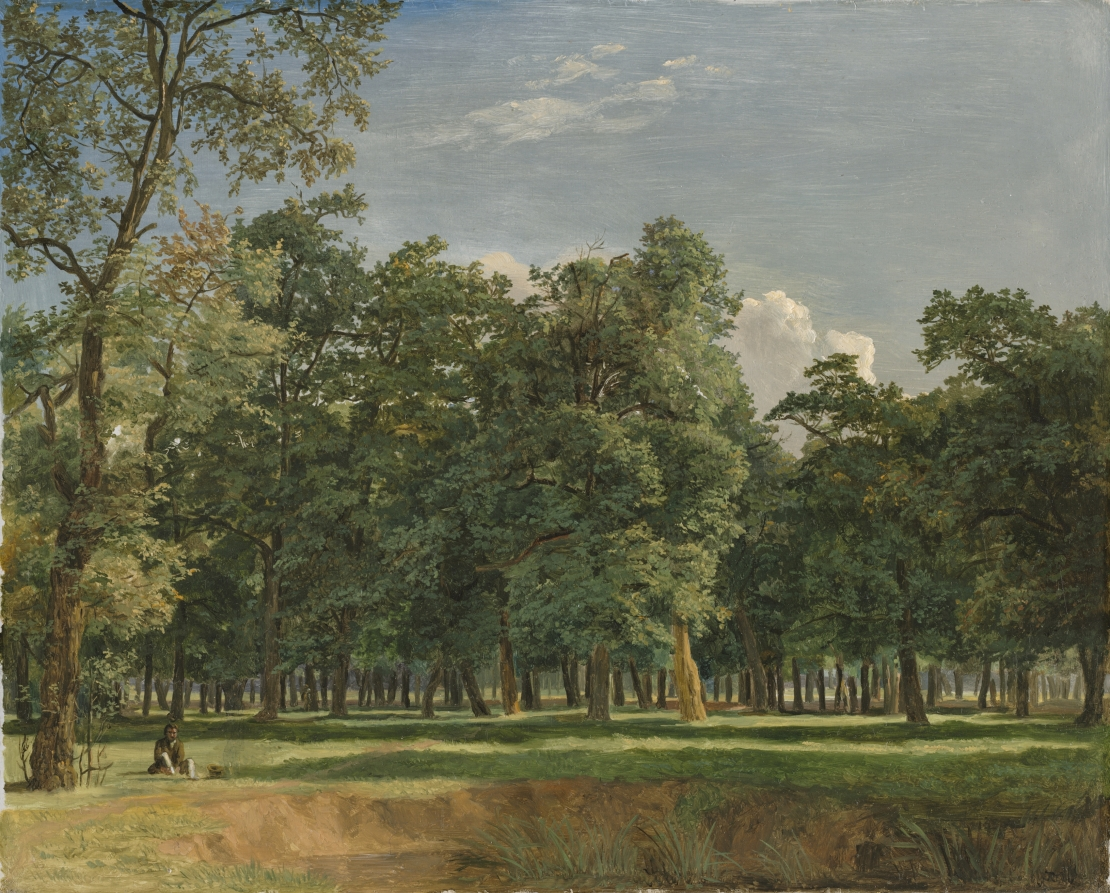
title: Prater Landscape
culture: Austria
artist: Ferdinand Georg Waldmüller (Austrian, 1793–1865)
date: c. 1831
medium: oil on wood panel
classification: Painting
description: In this depiction of the Prater, a large public garden in Vienna, Austria, a man sits beside a tree in the left foreground. Brilliant sunlight floods into the park illuminating a multitude of trees, their leaves rendered with fine detail. Although celebrated for his portraits, Waldmüller also produced closely observed landscapes and often visited the Prater to paint the majestic oak trees. He was forced to retire from his position as a professor at the Vienna Academy for rejecting doctrines of idealized, moralizing art in favor of truth to nature based on direct observation.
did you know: Waldmüller, best remembered as one of the most important Austrian landscape painters, financed his early training by painting candy pictures and portrait miniatures, teaching children, and designing theater sets.